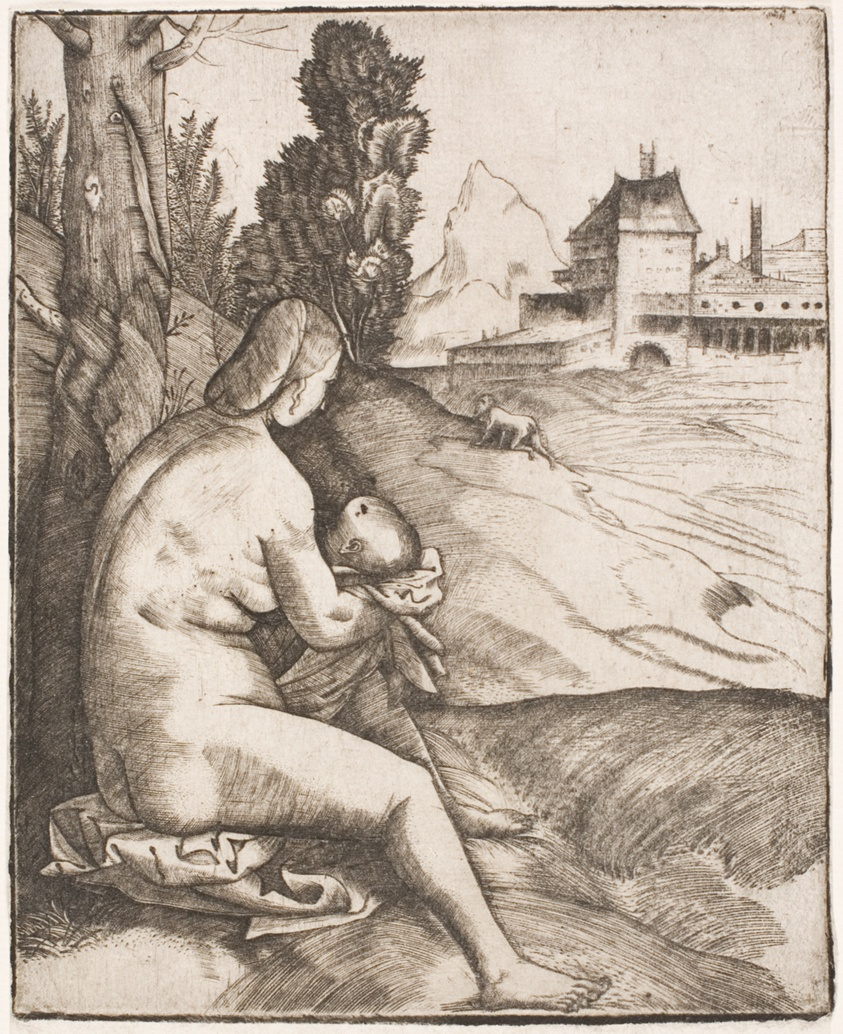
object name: Print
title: The Penance of Saint John Chrysostom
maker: attributed to Giulio Campagnola; Italian, c. 1482-1515/18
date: c. 1510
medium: Engraving on ivory laid paper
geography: Italy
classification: engraving; print; prints and drawing